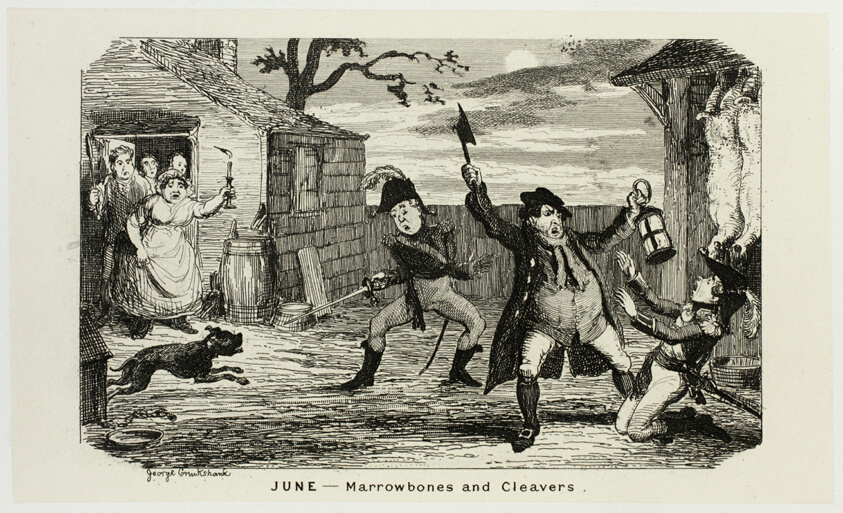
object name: Print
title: June - Marrowbones and Cleavers from George Cruikshank's Steel Etchings to The Comic Almanacks: 1835-1853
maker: George Cruikshank (English, 1792-1878); published by Pickering & Chatto (English, 19th century)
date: 1839, printed c. 1880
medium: Steel etching in black on cream India paper, laid down on off-white card (chine collé)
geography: England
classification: etching; paper; steel; print; prints and drawing